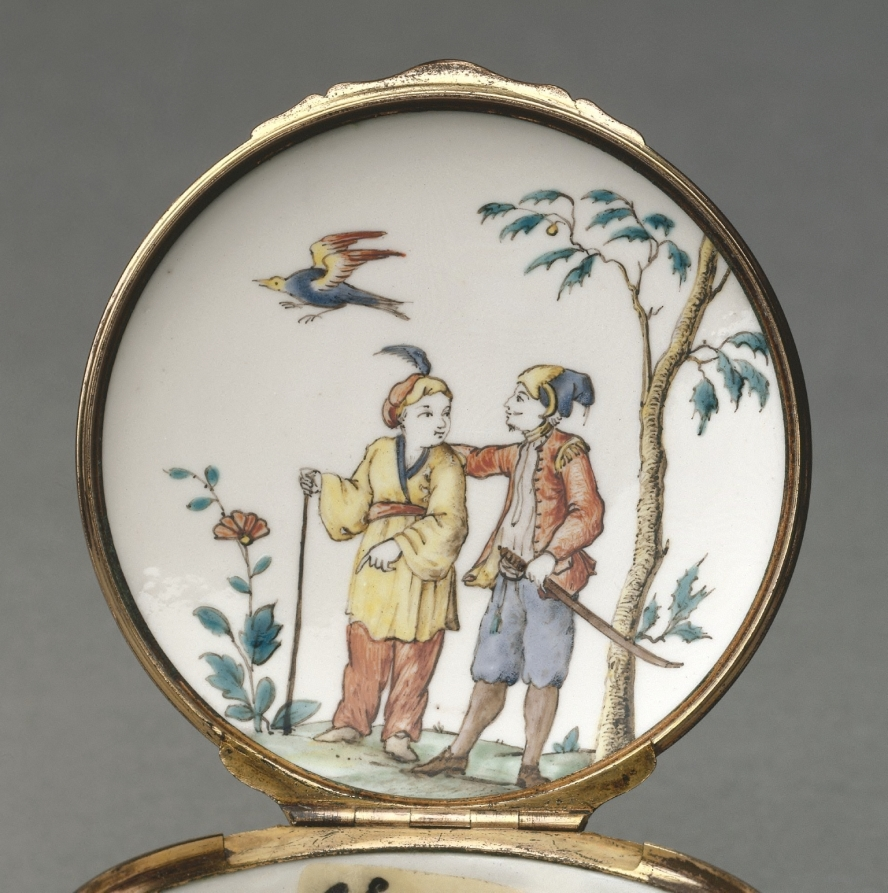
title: Snuff Box (Tabatière)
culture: France, 18th century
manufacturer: Chantilly Porcelain Factory (French)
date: c. 1745–1750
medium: Tin-glazed soft-paste porcelain with enamel decoration; gilded metal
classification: Ceramic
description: This snuff box’s decoration departs from the practice of early Chantilly porcelain that drew inspiration from Chinese and Japanese porcelain compositions, techniques, and motifs. Rather than compositions modeled directly from East-Asian porcelain, the paintings on this box may have been influenced by European chinoiserie, imitations of Chinese and Japanese decoration that pulled from the European imagination rather than accurate depictions of these cultures.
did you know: The enamels on this box are no longer applied flat without shading as was typical of early production at the Chantilly factory, but have been painted in a way that suggests depth through depictions of light and shadow.